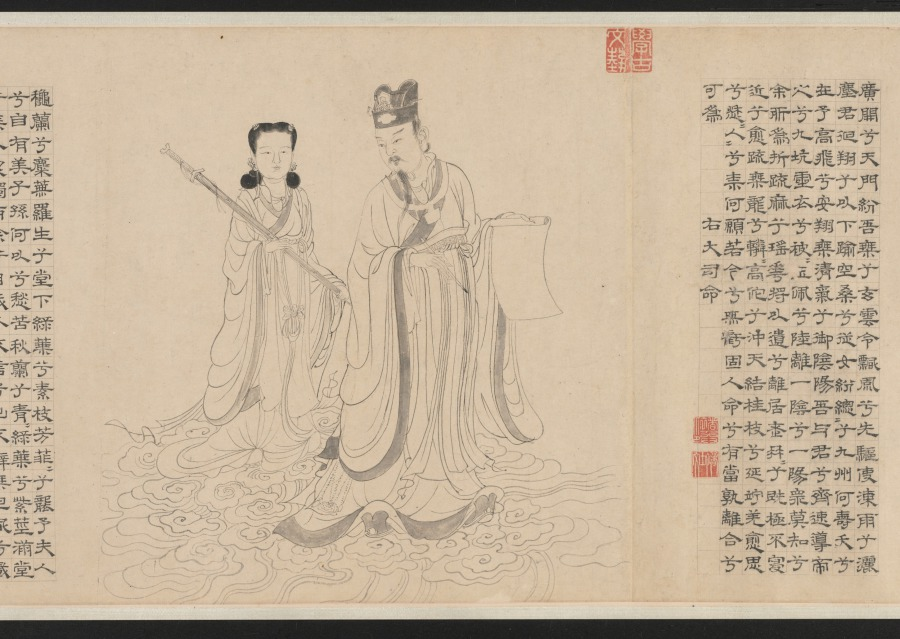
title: Nine Songs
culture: China, Yuan dynasty (1271-1368)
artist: Zhang Wo (Chinese, active c.1336–after 1364)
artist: Chu Huan (Chinese, active 1361)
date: 1361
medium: handscroll; ink on paper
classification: Painting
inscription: 7 colophons and 47 seals: 1 colophon, dated 1361, and 28 seals of Chu Huan 褚奐 (active c. 1361); 1 colophon, dated 1785, and 1 seal of Lu Shihua 陸時化 (1714-1779); 2 seals of Lu Yü-ch'ing (18th c.); 1 colophon, dated 1935, of Ye Gongchuo 葉恭綽 (1881-1968); 1 colophon, dated 1935, of Wu Hufan 吳湖帆(1894–1968); 1 colophon, dated 1938, and 1 seal of Wang Tongyu 王同愈 (1856-1941); 1 colophon, dated 1941, of Wu Huayuan 吳華源 (1893-1972); 1 colophon, dated 1942, and 9 seals of Xu Bangda 徐邦達 (1911–2012); 1 colophon, dated 1942, of Lang Jingshan 郎靜山 (1892-1995); 1 colophon, dated 1944, of Tang Yun 唐雲 (1910-1993); 6 seals of Wang Jiqian [C.C. Wang] 王季遷 (1907–2003).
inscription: Text of The Nine Songs written by Chu Huan at the end of each section.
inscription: 右離騷九歌圖，宋龍溟居士李公本，淮南張渥叔厚所畫妙絕當世。家藏請予書其辭目識于左。至正二十一年辛醜三月旦河南褚奐記。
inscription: Colophon by Lu Shihua 陸時化 (1714–1789): This scroll is fortunate to have been handed down from collections of the right people. Now, after 500 years, its condition is as good as when it was painted. I acquired this from Mr. Shen Guiyu [1673-1769], the President of the Board of Rites. The label is in his handwriting when he was 95 years old. I submit that Chu Huan (t. Shiwen) of the Yuan Dynasty was a native of Qiantang. His "seal" and li writings are in the style of Wu Rui. For example, in [Chu Kuei's] Ming ji lu [A list of masterpieces] is recorded the stele commemorating the restoration of the prefectural school of Kun-shan, the text of which was composed by Yang Weizhen in the twenty-first year of Zhizheng [1361]; and the calligraphy as well as the title in li style was by Chu Huan, who was at that time an assistant judge of the prefecture of Haining in the circuit of Hangzhou. Zhang Wo's zi is Shuhou (叔厚). His literary name is Zhen Qisheng (贞期生). According to [Gu Ying's] Yu shan cao tang ya jii, he liked to paint in the bai-miao or the "pure delineation" style after the method of Li Longmian [Li Gonglin 李公麟], which finds no peer among the ancient masters. This is agreed upon [by Pei Ch'iung] in his Qing jiang zhi who praised [Zhang Wo] as being quite learned and well-versed in many branches of the arts, especially figure painting. Recorded by Lu Shihua [The mountain dweller], listening to the pine, in the twelfth month of the yisi year [1785].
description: Painted in the baimiao, or fine-line drawing style, this ancient work demonstrates the literati’s use of abstract calligraphic brushwork for self-expression. The subject of the “Nine Songs”—songs associated with shamanistic rituals in the ancient Chu kingdom—had traditionally provided artists with myths and legends that they could explore and reinterpret in their own works.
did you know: Divided into eleven sections, the scroll contains illustrations by painter Zhang Wu followed by a transcription of the relevant verse by calligrapher Chu Huan.